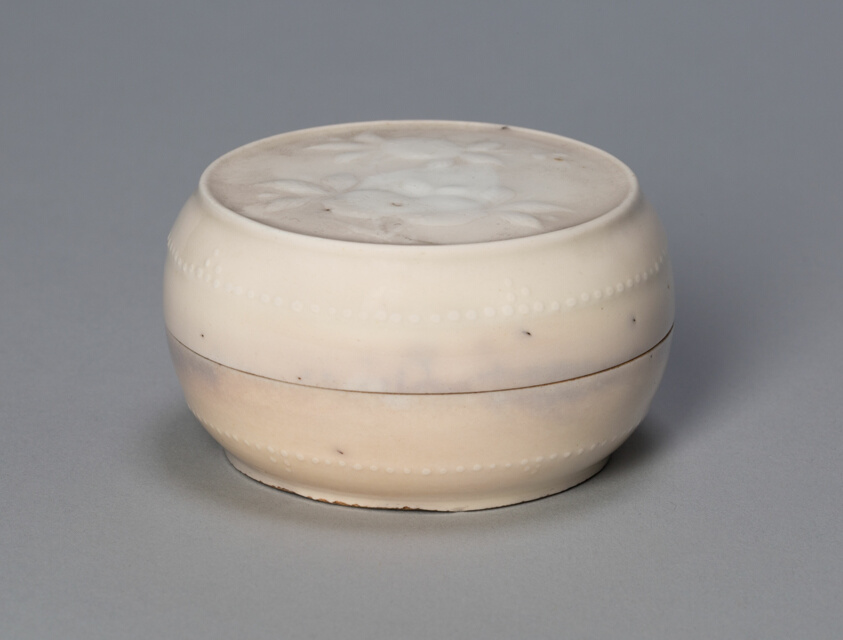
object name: Vessel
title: Covered Box with Peaches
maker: China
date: Qing dynasty (1644–1911), Kangxi period (1662–1722)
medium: Porcelain with underglaze molded decoration and white glaze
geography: China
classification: porcelain; asian art; ceramics